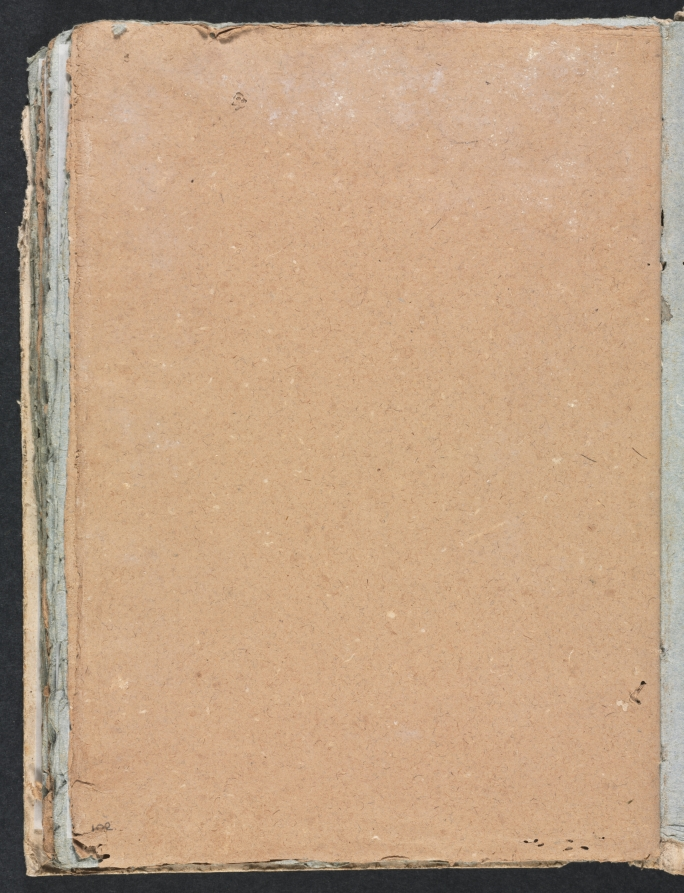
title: Verona Sketchbook: (page 102)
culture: Italy, 18th century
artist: Francesco Lorenzi (Italian, 1723–1787)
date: 1760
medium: paper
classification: Bound Volume